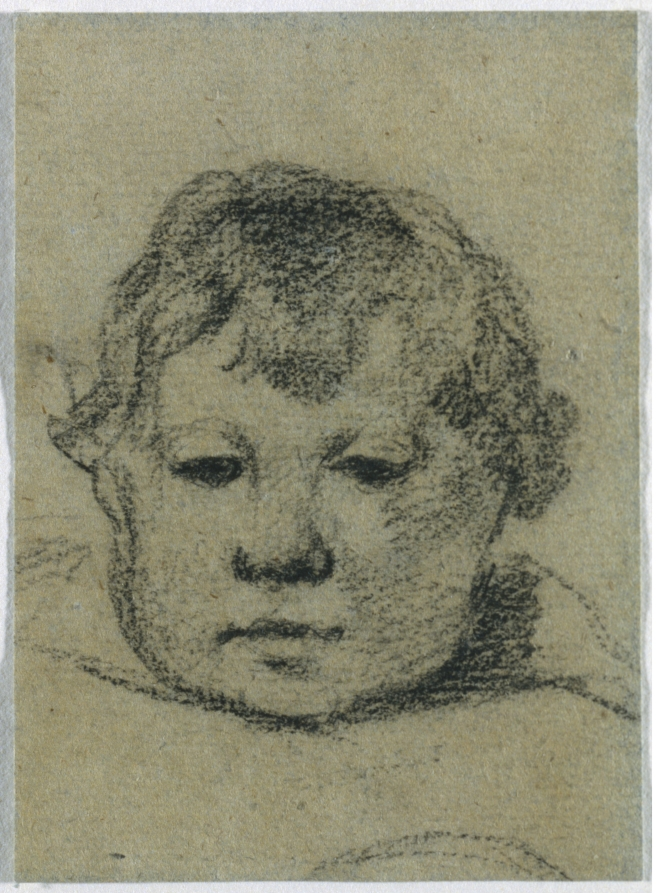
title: Emil Gauguin as a Child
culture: France, 19th century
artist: Paul Gauguin (French, 1848–1903)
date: c. 1875–1876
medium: black crayon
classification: Drawing